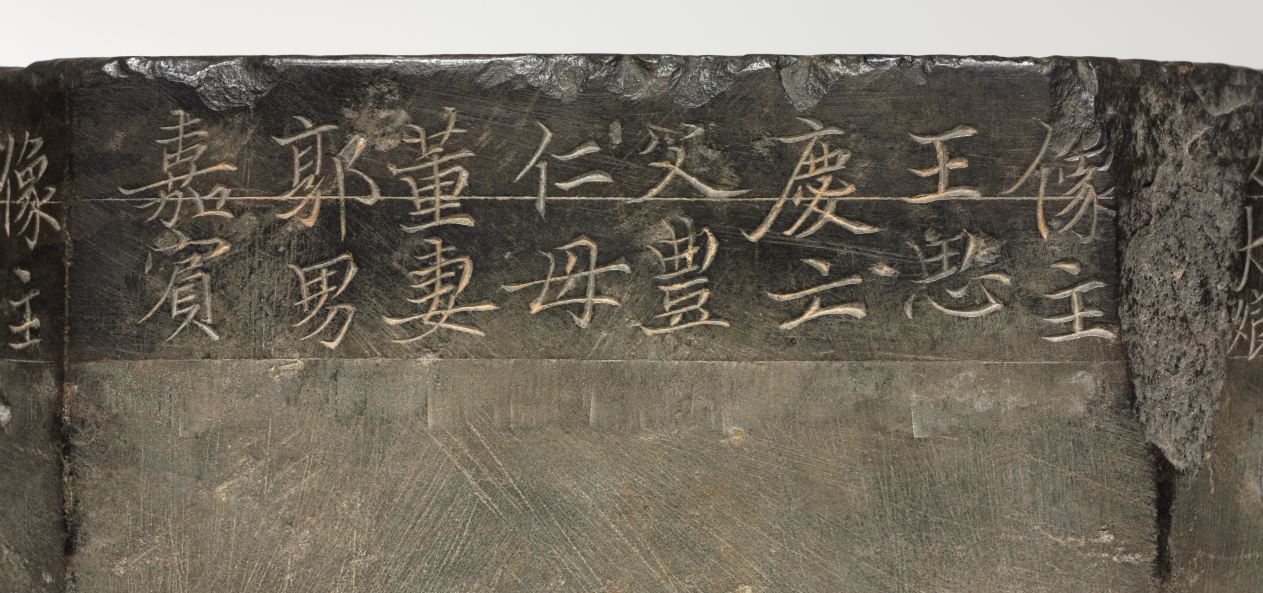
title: Section of a Dharani Pillar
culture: China, Tang dynasty (618-907)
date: 618–907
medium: limestone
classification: Sculpture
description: This octagonal stone pillar, with Buddhist figures carved on its eight sides, is part of a dharani pillar commissioned by Buddhist believers to pay tribute to the dead. The eight inscriptions seen here are eulogies dedicated by eight families to their deceased family members. Dharanis were a form of spell in Esoteric Buddhism said to possess supernatural power when being recited or carried and were incorporated into sutras, such as the Buddha Usnisa Vijaya Dharani Sutra. Dharani pillars, also called sutra pillars, became the dominant bearers of Usnisa Vijaya Dharani which supposedly helped sentient beings prolong life and destroy hardships of the eternal cycle of life and the realms of hell.